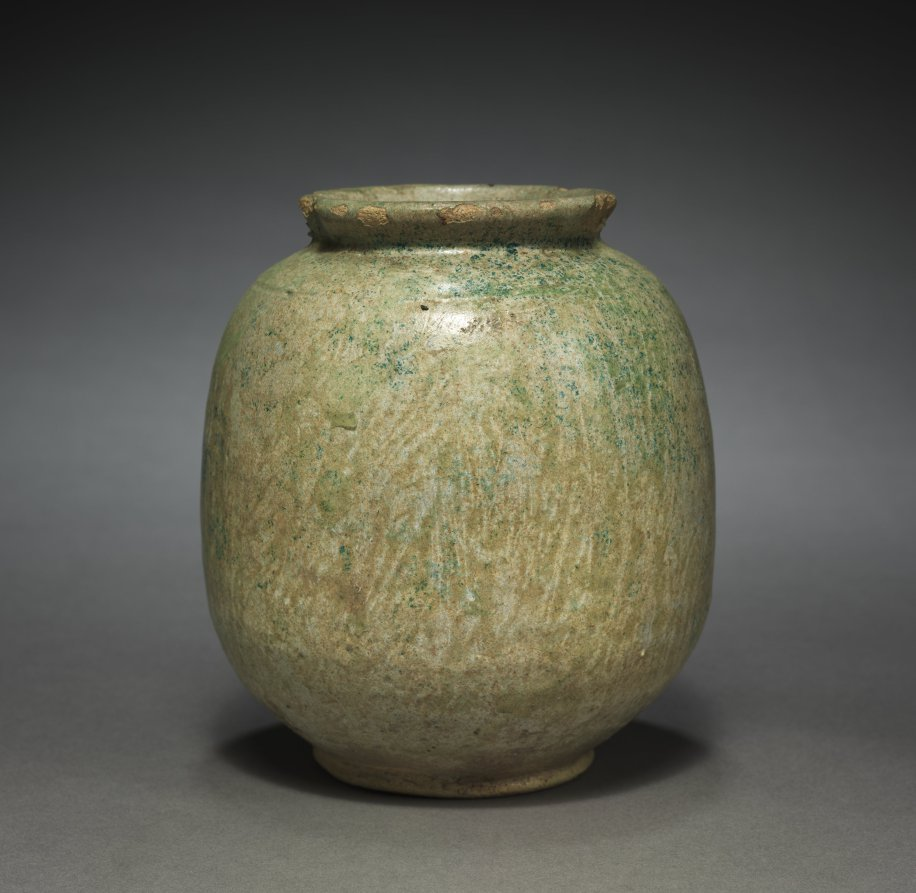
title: Ovoid Vase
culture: Parthian Empire (247 BCE–224 CE)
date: 1–200 CE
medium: terracotta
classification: Ceramic